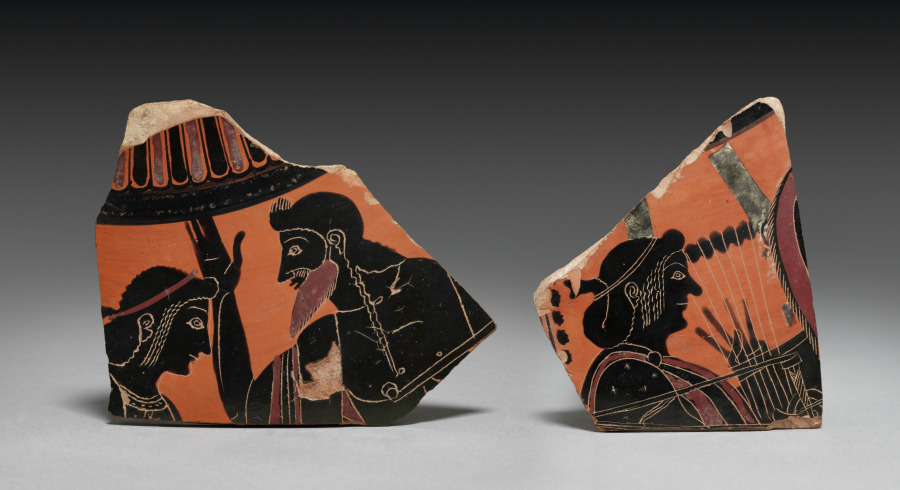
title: Fragment from Black-Figure Neck-Amphora of Panathenaic Shape (Storage Vessel): Apollo and Zeus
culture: Greek, Attic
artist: manner of Antimenes Painter (Greek, Attic, active c. 530–510 BCE)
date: c. 520 BCE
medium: ceramic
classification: Ceramic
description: Comparison with better-preserved vases—and with other artworks and monuments, such as the famous Siphnian Treasury at Delphi—helps to fill in some of the action no longer surviving from the rest of this vase, which once showed Apollo and Herakles struggling for the Delphic tripod. One claw-footed leg of the tripod survives, across the chest of Zeus, the bearded figure who intervened to stop the quarrel between two of his sons. Apollo is the unbearded figure at left, while Herakles would have appeared beyond the break on the right.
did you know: The claw-footed tripod leg before Zeus's chest identifies the scene—the struggle for the Delphic tripod.